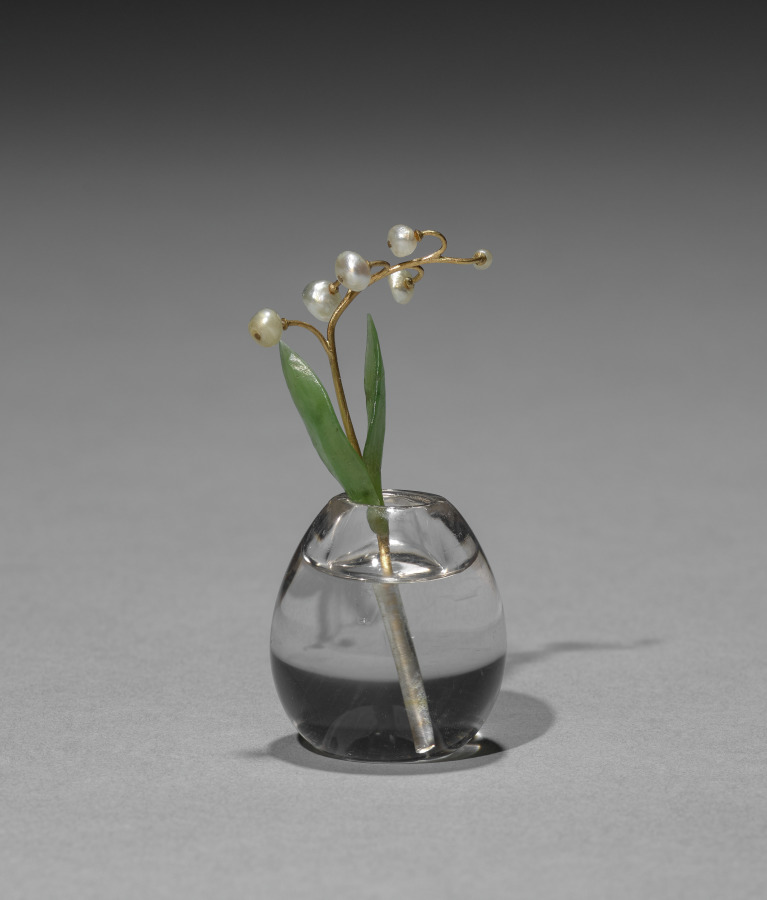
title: Flower Study of a Miniature Lily of the Valley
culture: Russia, St. Petersburg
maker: House of Fabergé (Russian, 1842–1918)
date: c. 1885–1915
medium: pearls, jade, rock crystal, gold, diamonds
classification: Miscellaneous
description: A small, carved rock crystal vase holds this lily of the valley study. The pearls, forming the flower’s buds, are drilled and attached to the remarkably slim gold stem. The hand-cut nephrite (jade) leaves enhance the naturalistic aura of the flower. Fabergé’s inspiration for his flower studies is said to have come from the floral brooches of precious stones that were made in the 1700s for Catherine the Great as well as from the Japanese art of flower arranging, known as ikebana.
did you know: Small and delicate, Fabergé’s flower studies were given as intimate gifts to friends by Tsarina Alexandra and others in the court. She kept them in all the palaces as a reminder of spring during the harsh Russian winters.